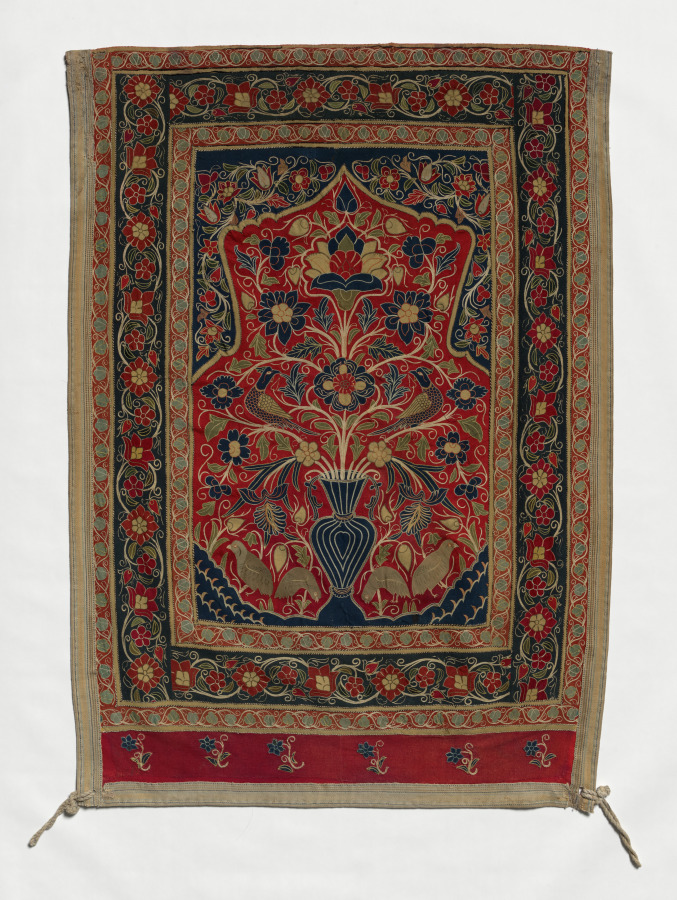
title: Royal Round Tent made for Muhammad Shah (wall panel with one design unit)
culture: Iran, Rasht, Qajar period (1779-1925)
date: 1834–48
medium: Interior: wool: plain weave, inlaid work; silk: embroidery, chain stitch; tape, leather; Exterior: cotton, wool: plain weave; rope, iron ring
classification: Textile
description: Royal tents were potent symbols of authority, wealth, and power throughout the greater Middle East. Rulers owned thousands of tents. They were used for shelter, shade, and innumerable functions in tent compounds that were essential for imperial ceremonies, travel, and military campaigns. Distinguished by size with elaborately decorated interior walls and ceilings, tents could be as large as castles. Opulent tents were also presented as imperial gifts. Tents are only known through documents before 1600. For example, in Baghdad in 809, Caliph Harun al-Rashid owned 4,000 ceremonial tents and 150,000 camping tents that were stored in the imperial Abbasid treasury. An astonishing variety and quantity of tents were housed in the royal Fatimid tent storeroom in Cairo in 1068-69, including "military tents, fortress tents, and castle tents, manufactured of . . . gold-brocaded stuff embroidered with designs of elephants, wild beasts, horses, peacocks, birds." Since 1600, Ottoman Turkish tents with elaborate floral decoration have been preserved in Istanbul in the Topkapi Palace Museum and Military Museum, and in European collections as war booty, primarily from the Ottoman Turks' attempt to conquer Vienna in 1683. These tents are not done in the Rasht technique, but rather are applique. In contrast, royal tents from Iran are extremely rare. This spectacular ceremonial tent is embroidered with the name of its owner, Muhammad Shah, who ruled Iran from 1834 to 1848 during the Qajar dynasty. The radiant jewellike interior features exuberant flora, blossoming vines, and robust birds made with colored wool embellished with silk-thread embroidery.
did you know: Rasht work is named after the city on the Caspian Sea in present-day Iran, which was a major silk trade center with numerous textile workshops.